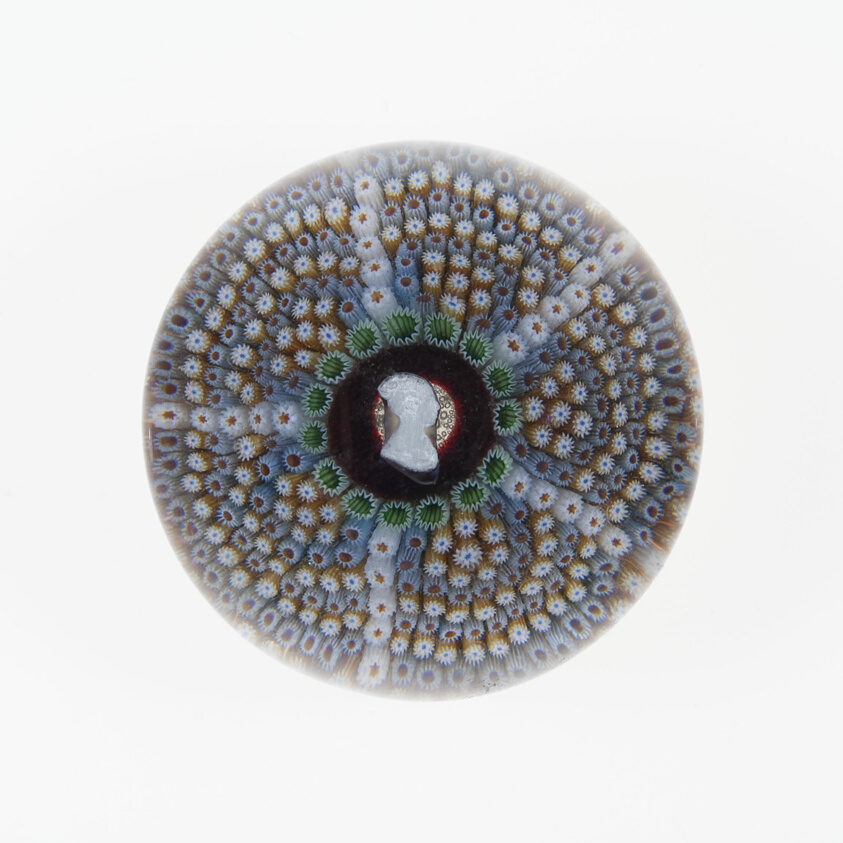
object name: Glass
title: Paperweight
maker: Saint-Louis Glassworks (Cristalleries de Saint-Louis); Lorraine, France, founded 1586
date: 19th century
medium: Glass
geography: Saint-Louis-lès-Bitche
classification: paperweight; millefiori; european decorative arts; glass